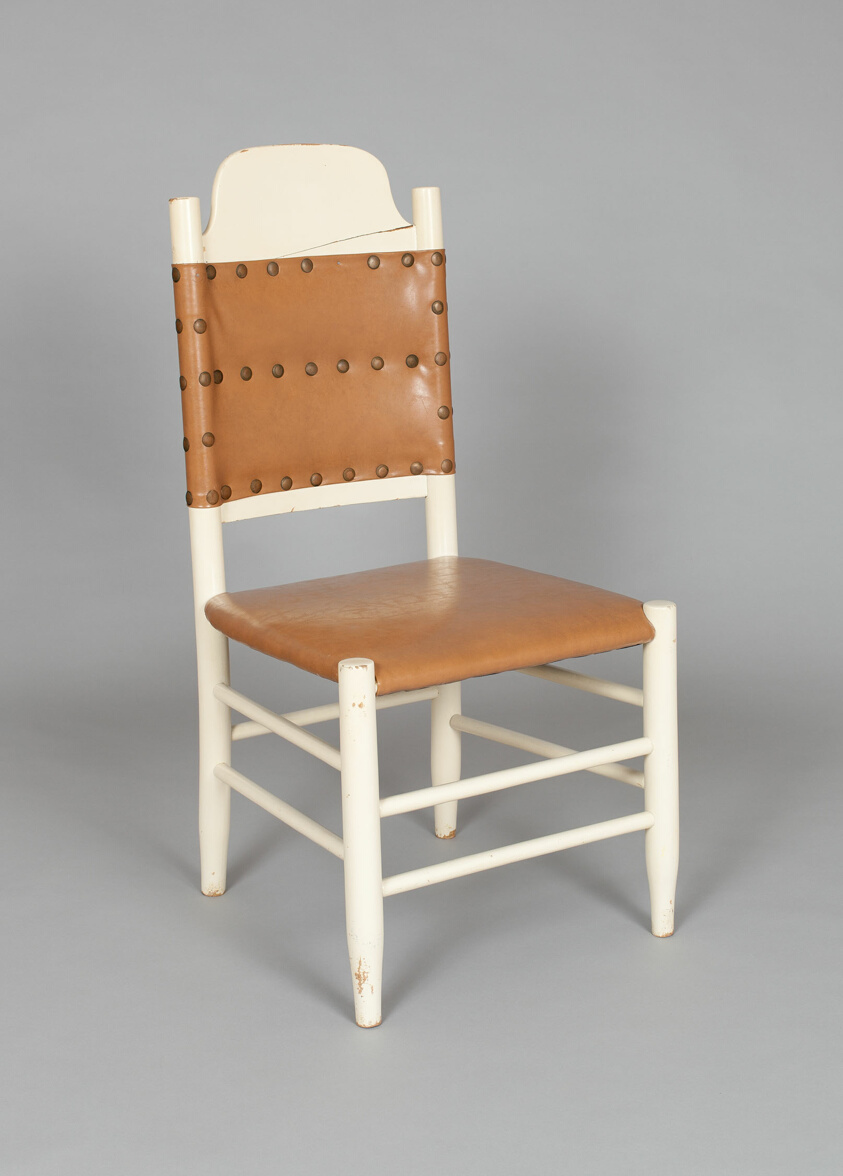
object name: Furniture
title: Side Chair (part of a set)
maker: Designed by Louis Comfort Tiffany (American, 1848–1933); Made by J. Matthew Meier (American, 1830–1913) and Ernest Hagen (American, 1822–1889); New York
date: c. 1885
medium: Painted maple, with vinyl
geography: New York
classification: seating; furniture; american decorative arts; american arts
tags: furniture